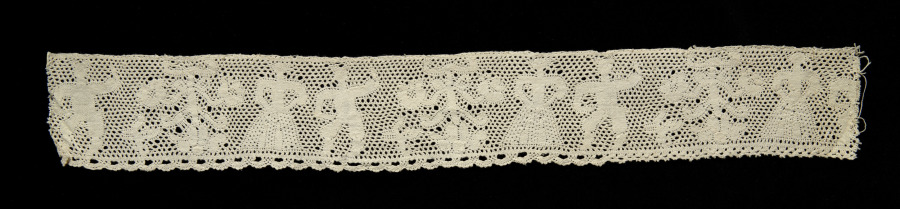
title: Lace Edging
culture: Italy, Abruzzi, Pescocostanzo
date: 1600s–1700s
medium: Bobbin lace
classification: Lace